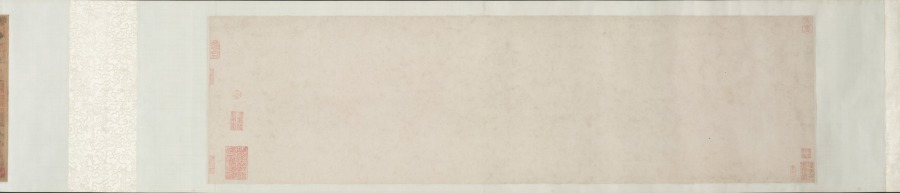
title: Garden for Solitary Enjoyment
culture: China, Ming dynasty (1368–1644)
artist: Qiu Ying (Chinese, 1494–1552)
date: 1515–52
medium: Handscroll; ink and light color on silk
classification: Painting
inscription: Accompanying text of an essay together with seven poems of Sima Guang (1019–1086) and one poem of Su Shi (1037–1101) written by Wen Zhengming (1470–1559) in 1558.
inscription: 2 colophons and 82 seals: 4 seals of Wen Zhengming 文徵明 (1470–1559); 59 seals of Xiang Yuanbian 項元汴 (1525–1590); 1 colophon, dated 1644, and 7 seals of Xiang Yukui 項禹揆 (c. late 1500s–1659); 1 colophon, dated 1880, and 2 seals of Weng Tonghe 翁同龢 (1830–1904); 2 seals of Ch'eng Chen-i (19th c.); 1 seal of Han Ch'ung (19th c.); 4 seals of Wan-go H. C. Weng 翁萬戈 (1918–2020); 3 seals unidentified.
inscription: Colophon by Xiang Yukui 項禹揆 (c. late 1500s–1659): The painting of The Garden for Self-enjoyment on the right by Shih-chou, Mr. Qiu [Qiu Ying] is in the style of Li Lung-mien. Its mood is peaceful, as if meeting the ancient gentlemen face to face among the brushes and silk; it lifts one above the sordid bustle of life. Formerly, my late father handed me this scroll which had only the painting without the written essay. I considered asking a good calligrapher to write the essay to add to it but was afraid that the quality of the writing would not match the painting. Several years later, I saw at a friend's house this essay and poems (of Ssu-ma Kuang] written by Hengshan [Wen Zhengming], once owned by my grandfather; so I spared no expense to obtain it. I rejoiced at this and said: "The divine swords are finally united. How things are pre-destined!" Now my friend Chang Kung-chao's technique for mounting [painting and calligraphy] is excellent. Therefore by daring to take them out and join them together, I can preserve this beautiful story of singular reunion. Xiang Yukui recorded at Hai-yeh-t'ang [hall] two days before New Year's Eve in the jiasheng year of the Chongzhen era [1644]. trans. LYSL/HK/WKH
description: Garden of Solitary Enjoyment refers to a site built in 1073 by the statesman Sima Guang (1019–1086) after he had retired to Luoyang, Henan province. Every spring, visitors would flock to his garden. Each of its seven structures references a historic figure. Sima wrote: I channel streams [like Du Mu], to water flowers [like Bai Juyi], or trim bamboo [like Wang Huizhi]. . . . I know of no joy between heaven and earth that could take its place. Qiu Ying’s painting, created after an 11th-century version of the same theme, must have appealed to garden owners of the Ming dynasty, since it became the template for numerous Suzhou workshop copies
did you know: Sima Guang completed his monumental survey of Chinese history, Zizhi tongjian, in the garden depicted in this painting.